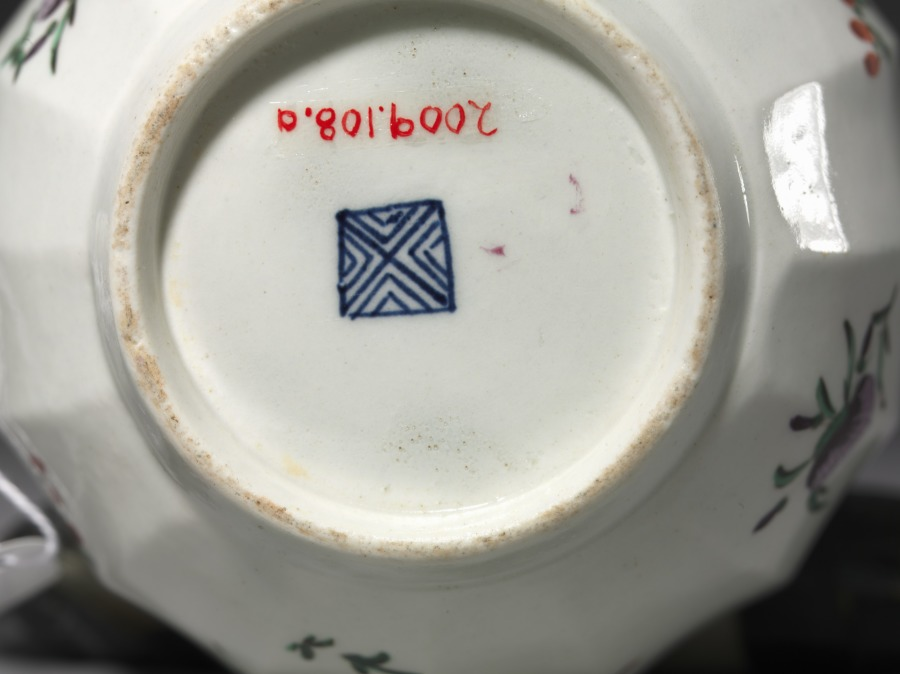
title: Teapot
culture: England, Worcester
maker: Worcester Porcelain Factory (British, established 1751)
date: c. 1755–75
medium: porcelain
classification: Ceramic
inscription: Mark on the bottom - An X with radiating lines inside a box.